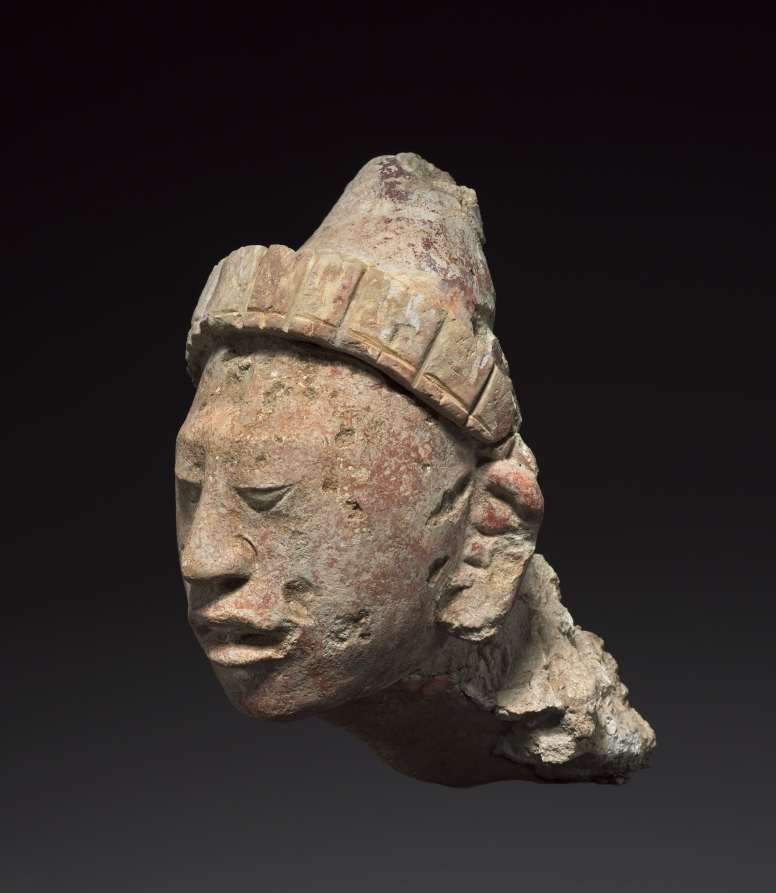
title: Head from a Building's Façade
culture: Mexico, Campeche, Maya style (250-900)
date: 250–900 CE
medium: stucco, paint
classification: Sculpture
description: The Maya often lavishly decorated the exteriors of buildings, transforming them into elaborate sculptural works in their own right. This sensitively modeled head, made from fragile stucco, would have been affixed to the façade of a palace or temple via the tenon (projection) at the back of the head. The rest of the body may have been modeled separately.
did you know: Maya elites practiced cranial modification on infants to achieve the sloped profile seen in this tenoned head.